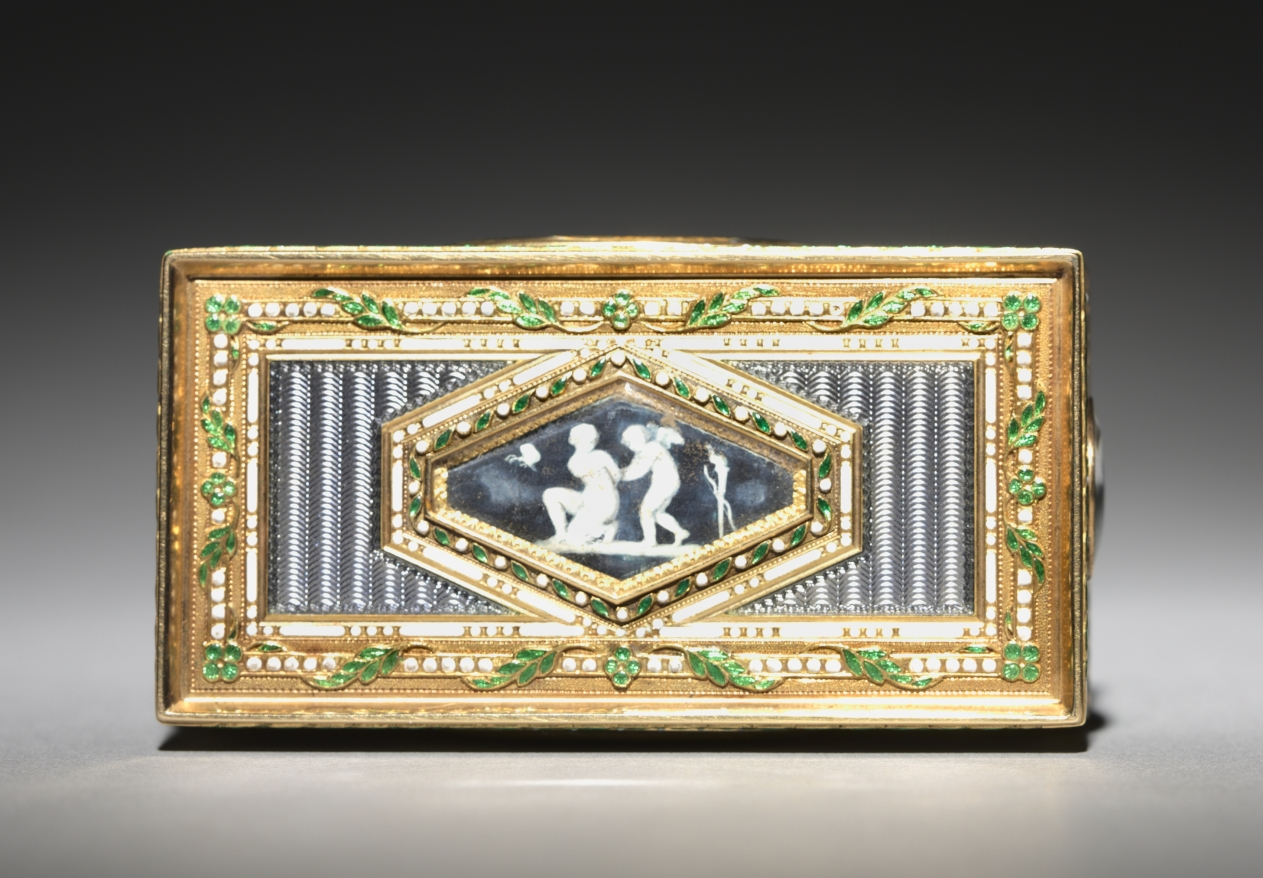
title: Snuff Box (Tabatière)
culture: France, 18th century (style of Louis XVI)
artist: François Chazeray (French)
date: 1777–78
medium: gold and enamel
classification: Metalwork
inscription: [Maker's mark of François Chazeray, master goldsmith in 1760, cover; bottom; front wall]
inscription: [Warden's mark (probably a crowned "O"), Paris, 1777-1778, cover; bottom; front wall]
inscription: [Illegible mark, bottom]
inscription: [Illegible mark, cover]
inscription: [Illegible charge mark, inside front]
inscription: [Discharge mark of Jean-Baptiste Fouache, Paris, 1774-1780, on neck at left.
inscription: [Outside of neck, modern inscription '4 (modern inscription]:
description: This box is decorated with figures of antiquity associated with love: winged cupids, dancing nymphs, and representations of the Greek goddess of love. These scenes are inspired by antique cameos, intricately carved gemstones crafted in ancient Greece and Rome. This interest in ancient iconography, symmetry, and classical compositions of gods and goddesses was characteristic of 18th-century neoclassicism.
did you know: Decorated with allegorical scenes of love, it is likely that this box was a present between lovers.